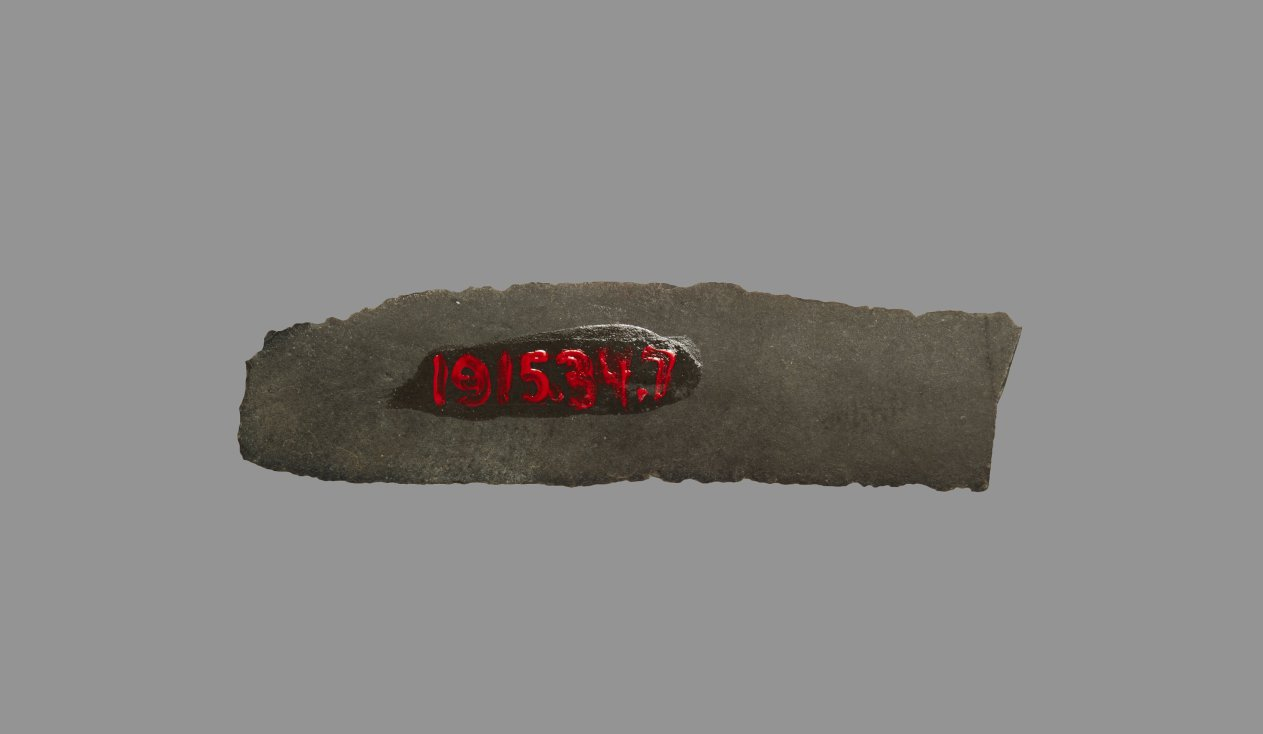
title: Sickle Blade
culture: Egypt, Middle Kingdom (2040–1648 BCE), Dynasty 12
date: 1980–1801 BCE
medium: flint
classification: Implements